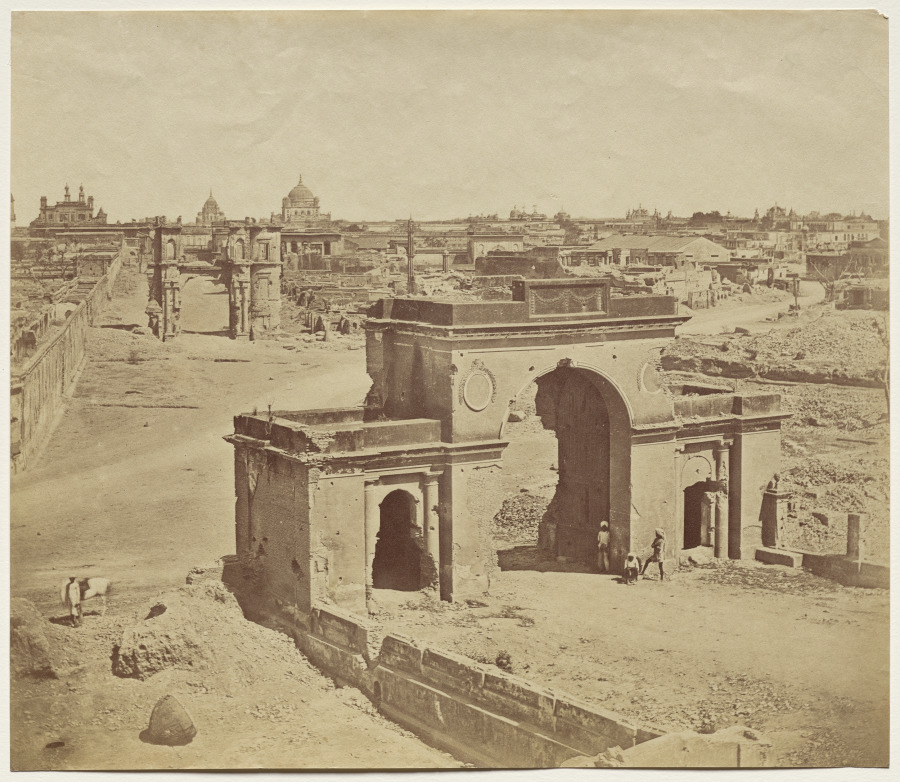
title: Bailee Guard Gate, Taken from the Inside, Showing the Clock Tower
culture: England, 19th century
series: Lucknow After the Siege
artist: Felice A. Beato (British, 1832–1909)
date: 1858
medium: albumen print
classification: Photograph